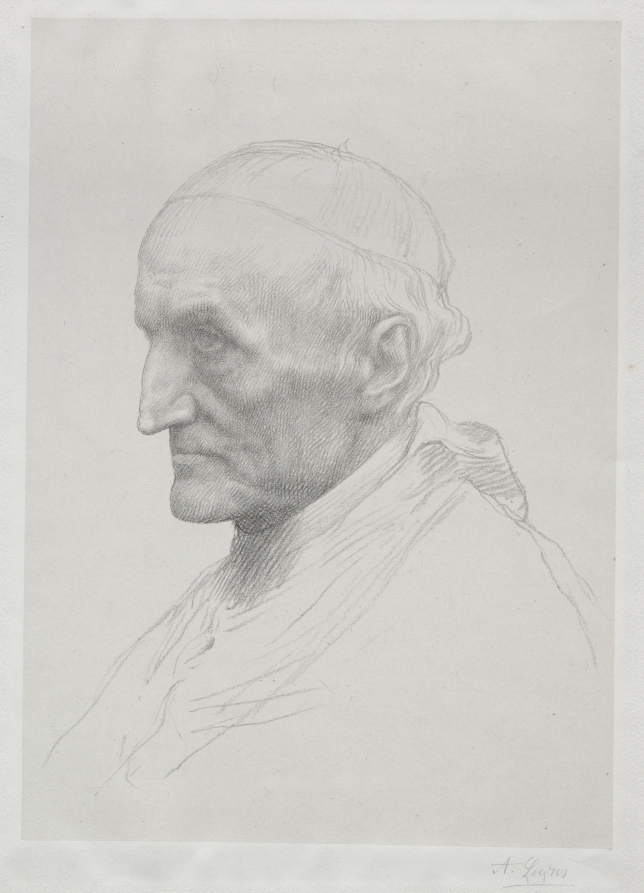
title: Portrait of Cardinal Manning (2nd Plate)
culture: France, 19th-20th century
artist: Alphonse Legros (French, 1837–1911)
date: c. 1857–1911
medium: lithograph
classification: Print